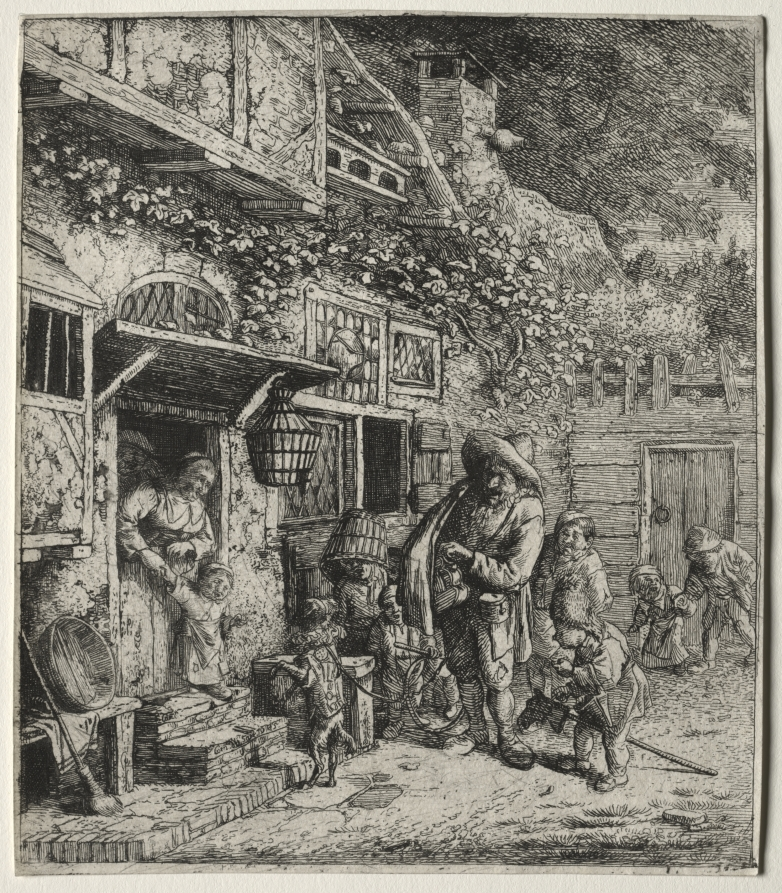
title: The Dancing Dog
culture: Netherlands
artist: Cornelis Dusart (Dutch, 1660–1704)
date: 1685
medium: etching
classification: Print